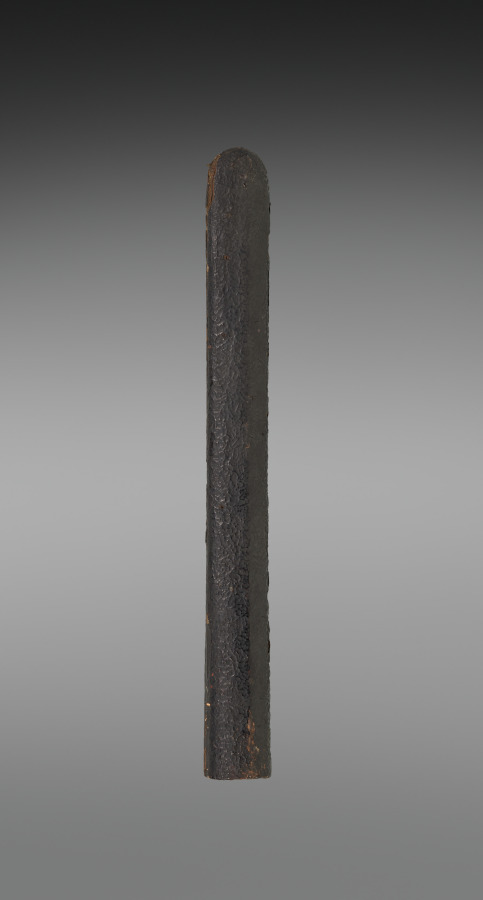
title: Sheath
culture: Japan, Edo period (1615–1868)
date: 1700s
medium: wooden handle, metal blade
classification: Arms and Armor